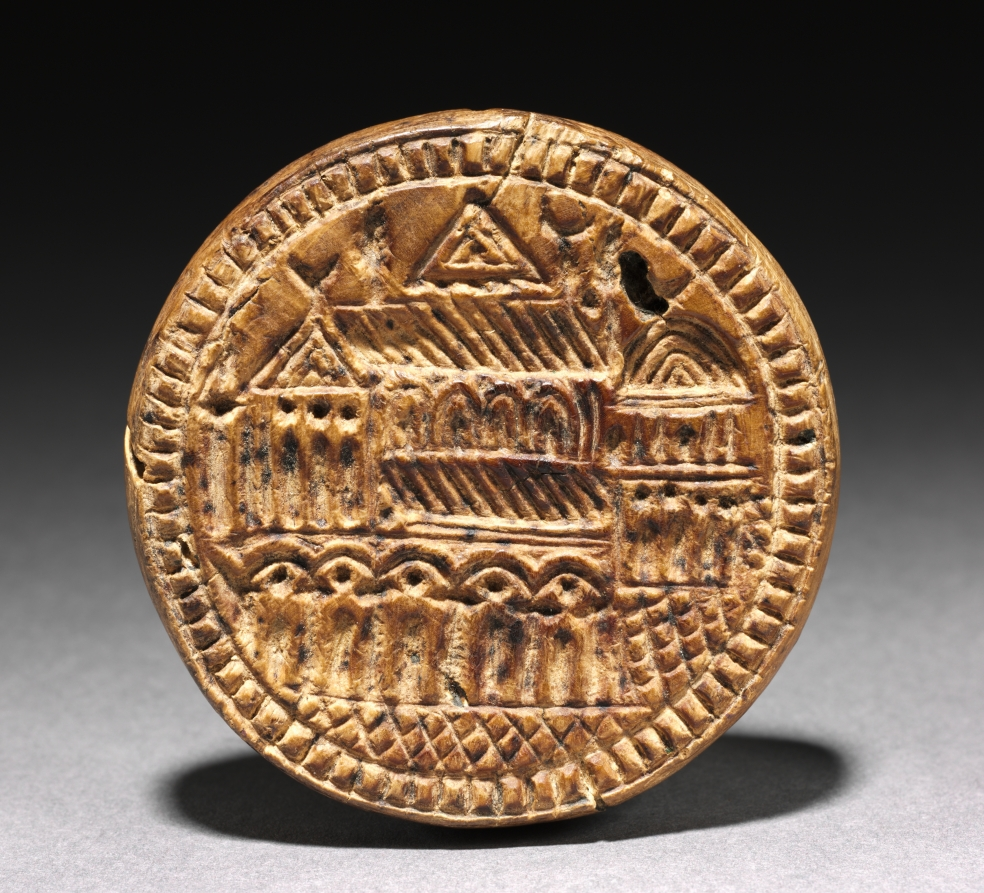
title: Mold for a Eulogia (Blessing) Bread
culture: Byzantium, Palestine, Byzantine period, 7th-10th century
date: 600s-900s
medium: wood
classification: Sculpture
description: It was a common early Christian practice to stamp images and inscriptions into loaves of bread using special molds. Representing the Church of the Holy Sepulcher on Mount Golgotha--the hill outside Jerusalem on which Christ was crucified and entombed--this wooden mold was probably used to stamp loaves of bread distributed to pilgrims visiting Jerusalem, in commemoration of their journey.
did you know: Medieval Christian pilgrims often traveled months or years to religious sites in the Holy Land and returned home with blessed mementos of their journey, such as vials of holy water, relics from saints, and even special loaves of bread. This mold was used to mark bread with an image of the Church of Holy Sepulchre in Jerusalem; the bread was then distributed to pilgrims.